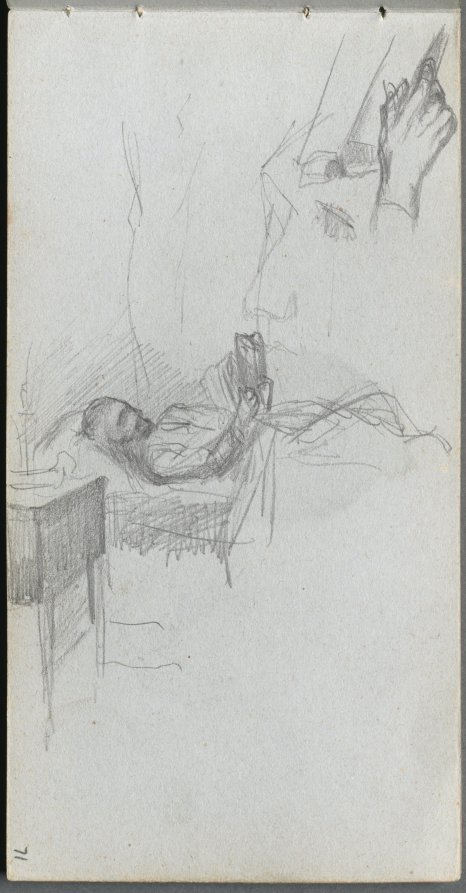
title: Sketchbook, page 71: Study of a Figure Reading in Bed, Study of a Hand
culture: France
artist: Ernest Meissonier (French, 1815–1891)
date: c. 1860s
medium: graphite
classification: Bound Volume